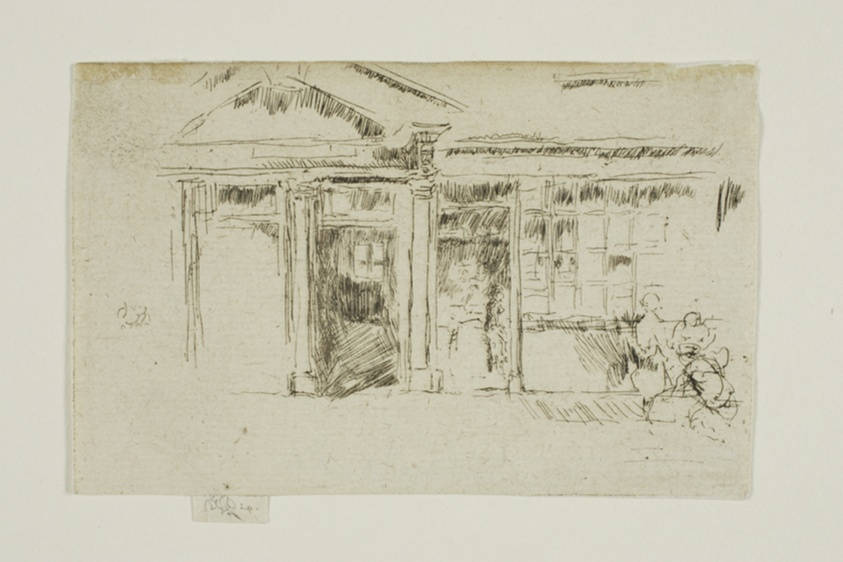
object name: Print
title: Double Doorway, Sandwich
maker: James McNeill Whistler (American, 1834-1903)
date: 1887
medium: Etching and drypoint with foul biting in black ink on ivory laid paper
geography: United States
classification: etching; foul biting; print; prints and drawing; paper; drypoint